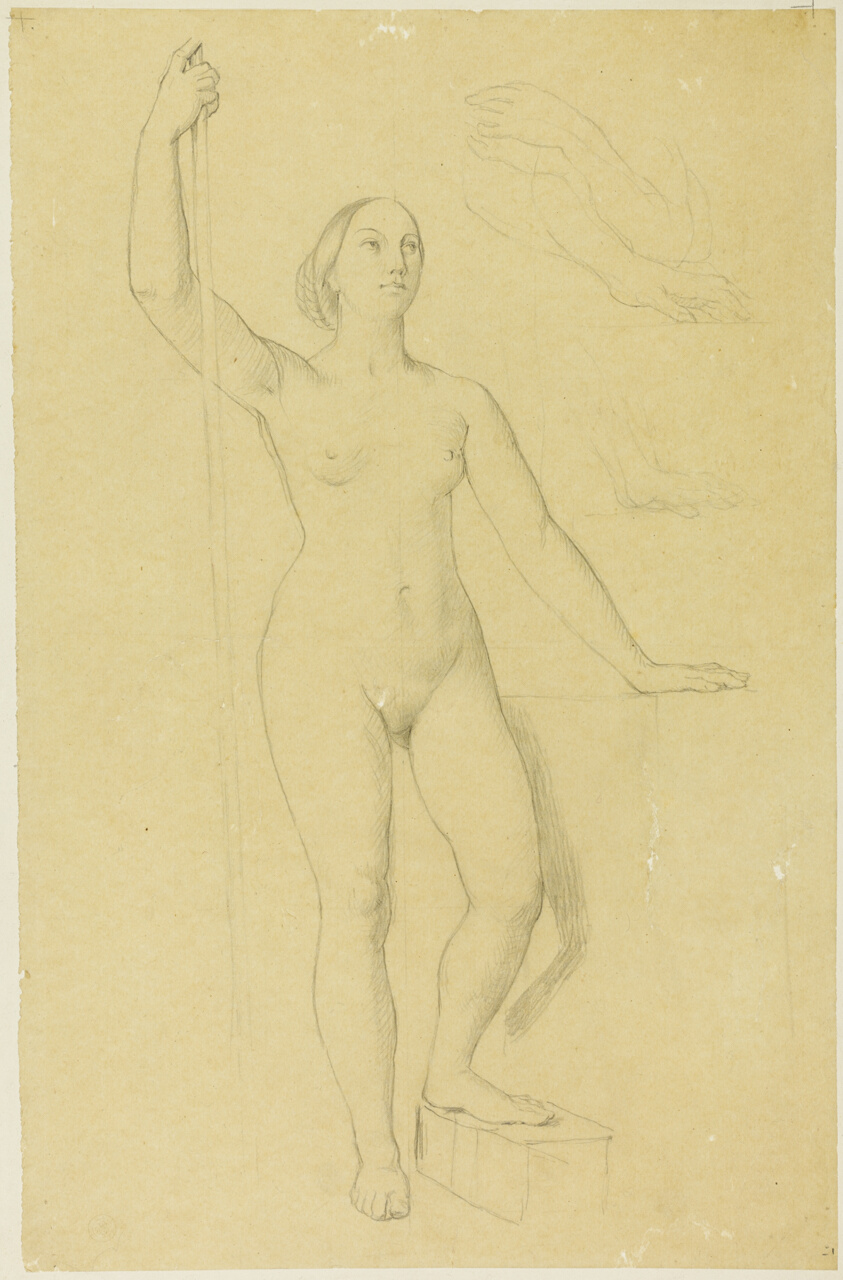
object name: Drawing and Watercolor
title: Study for Joan of Arc, and Sketches of Hands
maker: Jean–Auguste–Dominique Ingres; French, 1780–1867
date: c. 1851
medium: Graphite on tan wove tracing paper, laid down on off-white wove paper, laid down on cream board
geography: France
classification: graphite; drawings (visual works); prints and drawing